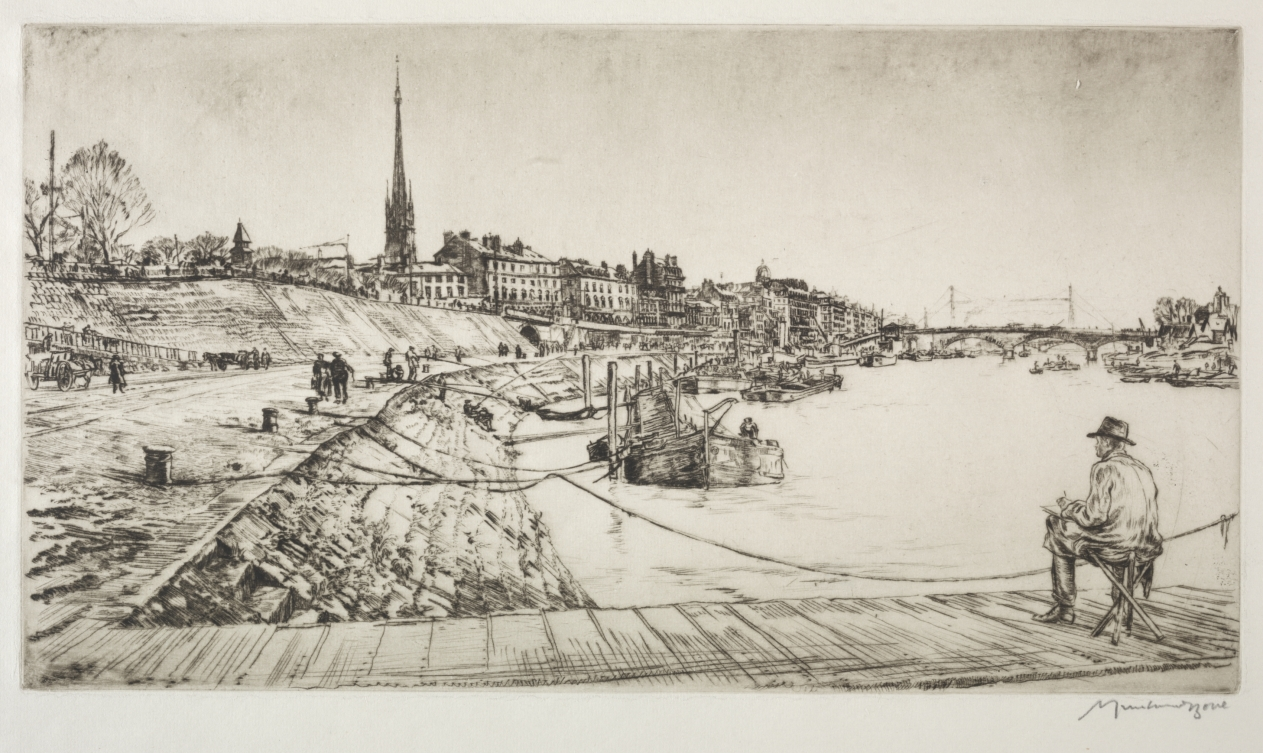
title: Rouen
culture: England, 20th century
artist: Muirhead Bone (British, 1876–1953)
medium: drypoint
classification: Print